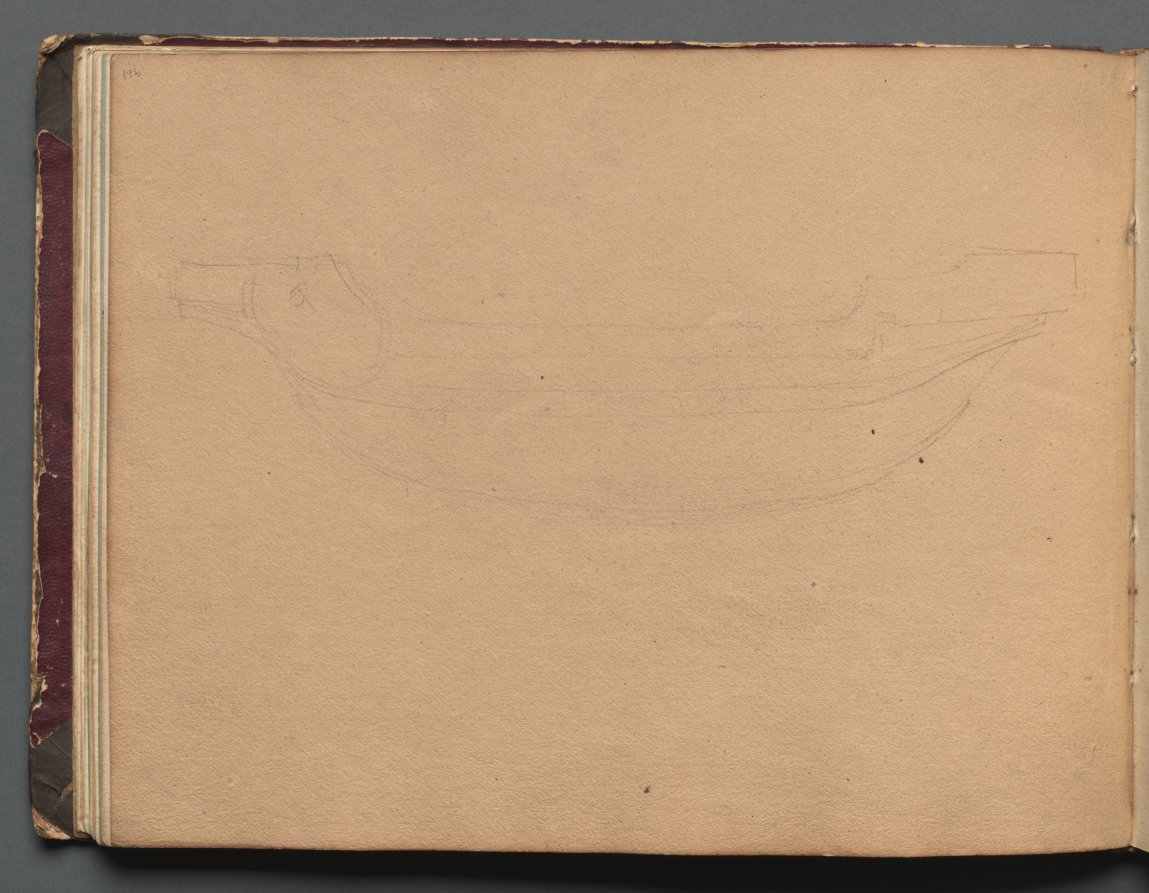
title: Album with Views of Rome and Surroundings, Landscape Studies, page 19b: Sketch of a boat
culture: Germany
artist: Franz Johann Heinrich Nadorp (German, 1794–1876)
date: c. 1830s-70s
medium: graphite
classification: Bound Volume